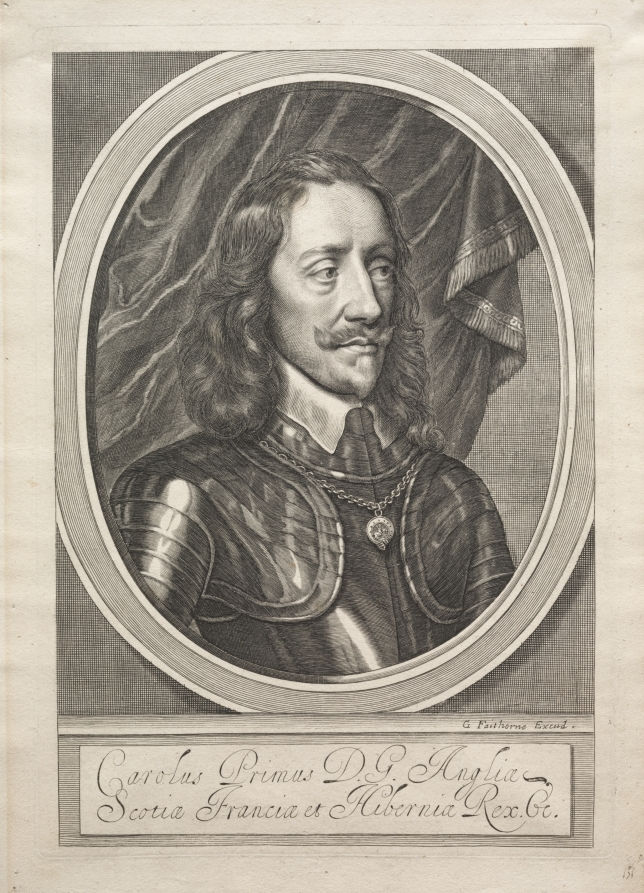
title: Charles I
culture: England, 17th century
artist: William Faithorne (British, 1616–1691)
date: c. 1658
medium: engraving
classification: Print